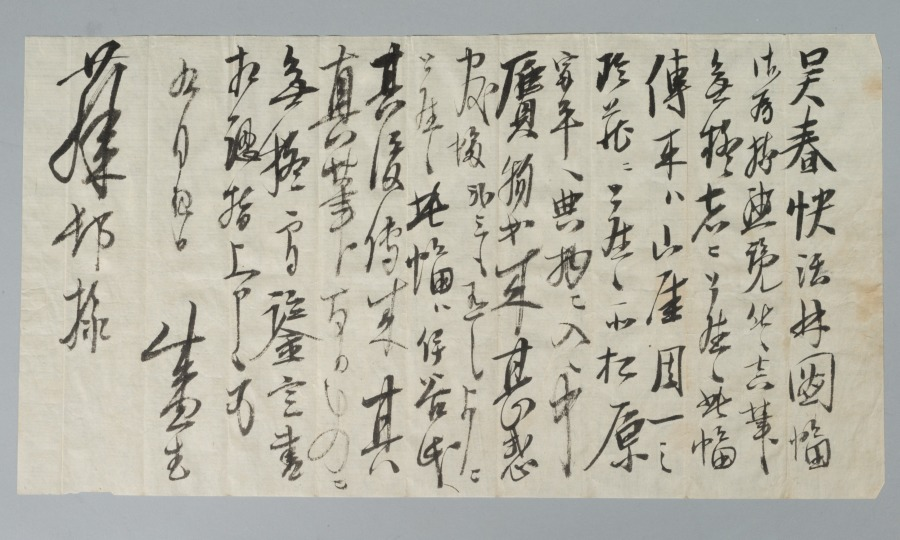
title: Happy Forest, from Water Margin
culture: Japan, Edo period (1615–1868)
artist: Matsumura Goshun (Japanese, 1752–1811)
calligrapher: and Amenomori Shōteki (Japanese, 1731–1786)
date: late 1700s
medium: hanging scroll; ink and color on paper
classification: Painting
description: The Chinese literary classic Water Margin is set in the 1120s and tells the story of 108 outlaws who first rebel against the government and then join forces with it. This painting depicts an episode in which hero Wu Song reclaims the tavern Happy Forest for its rightful owner, the prison warden’s son, Shi En. To prepare for the fight, Wu Song drinks a lot of wine. The painting was inscribed with a quote in which an ally describes Wu Song’s fighting style. It reads as follows: Where his twin fists rise, clouds and thunder roar, When his flying kick comes, wind and rain tremble.